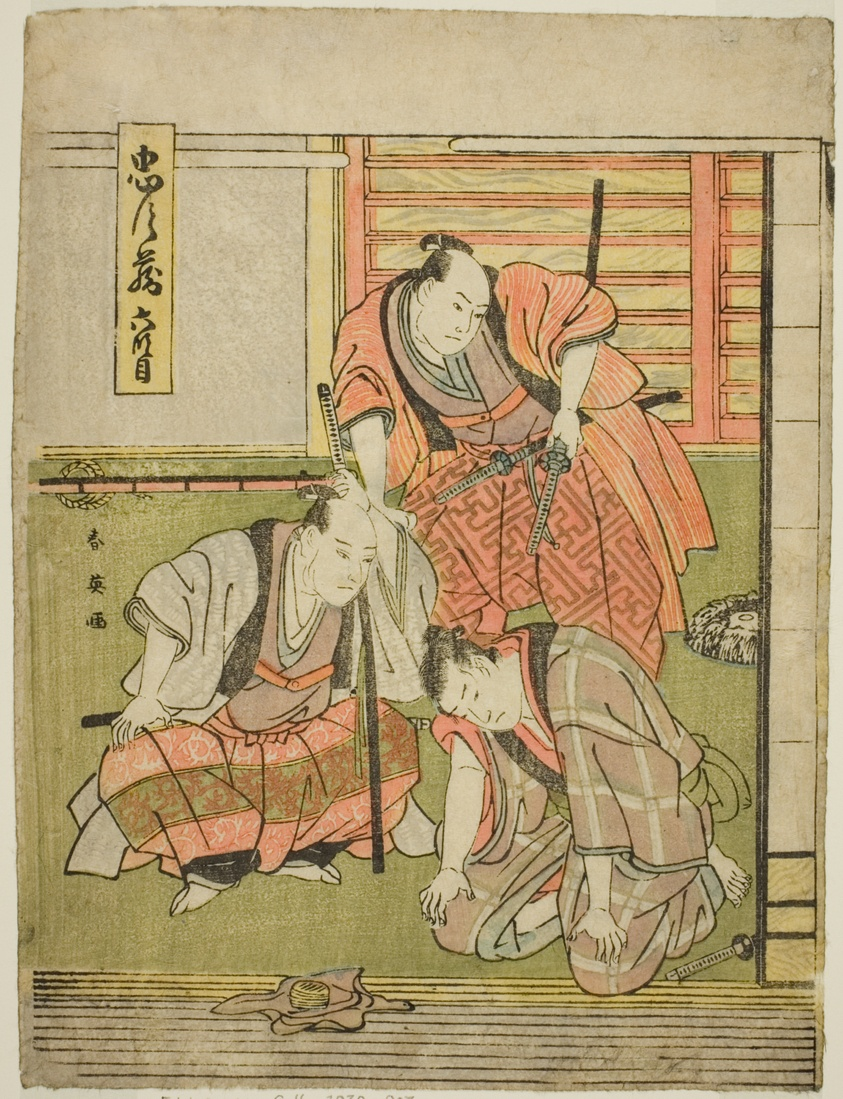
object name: Print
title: Act Six: Yoichibei's House from the play Chushingura (Treausry of the Forty-seven Loyal Retainers)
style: Japanese (culture or style)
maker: Katsukawa Shun'ei (Japanese, 1762-1819)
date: c. 1795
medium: Color woodblock print; koban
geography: Japan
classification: woodblock print; print; asian art